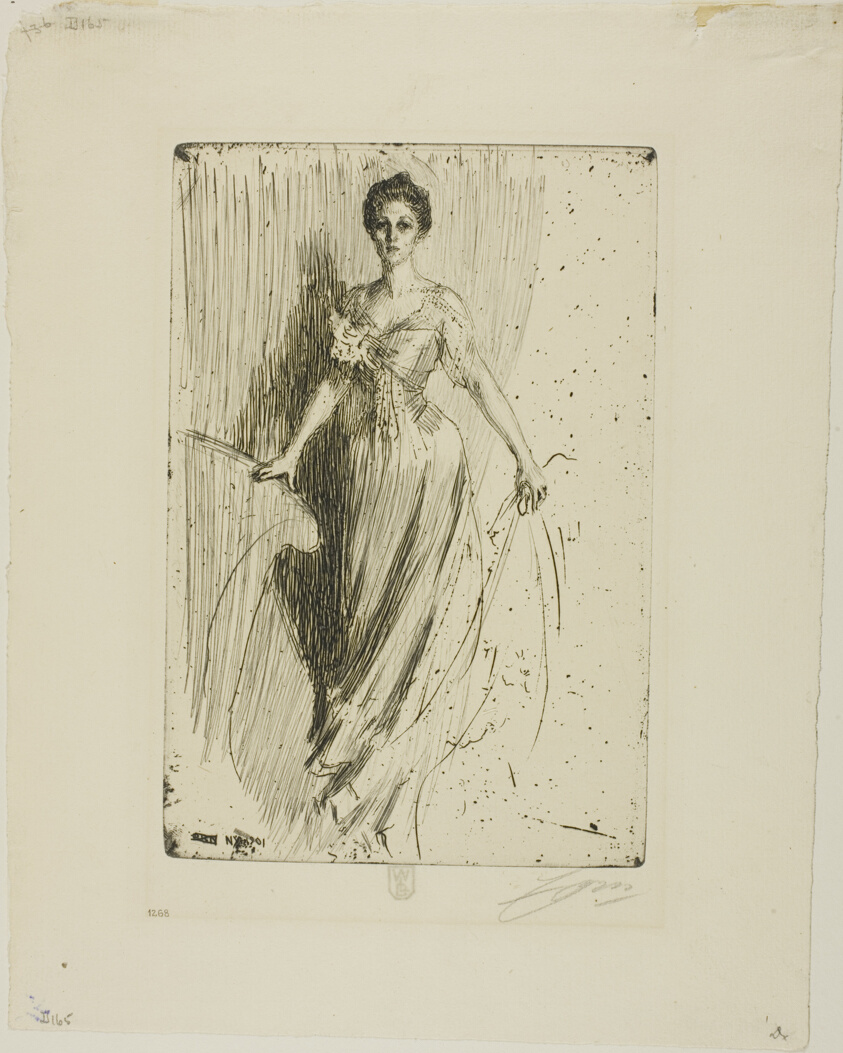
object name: Print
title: Miss Lurman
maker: Anders Zorn (Swedish, 1860-1920)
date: 1901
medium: Etching on ivory laid paper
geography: Sweden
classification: etching; print; prints and drawing